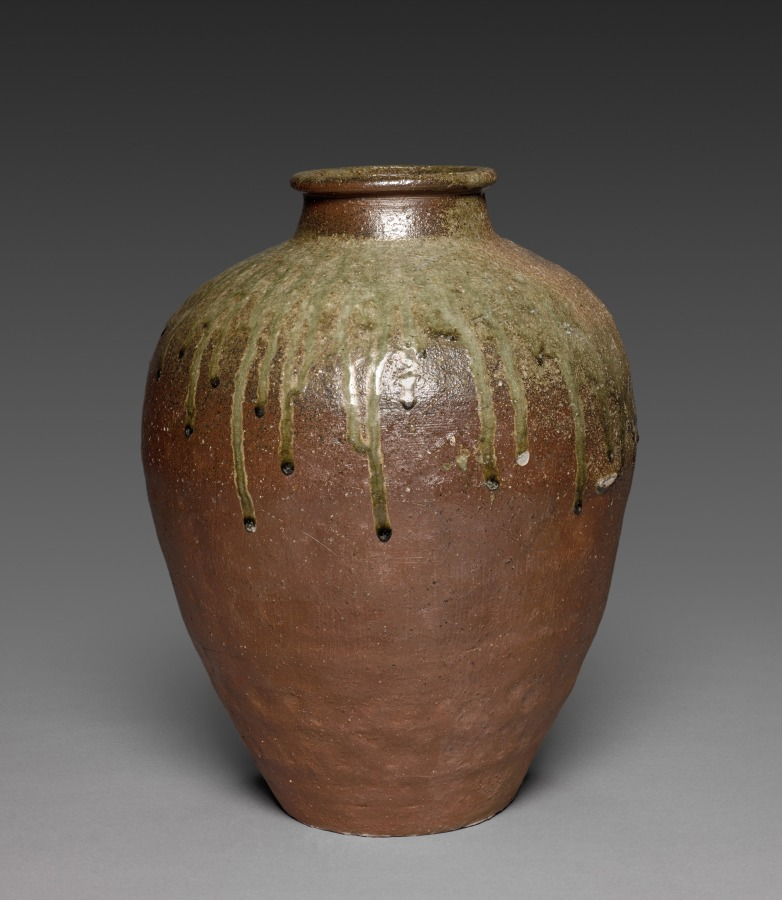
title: Water Jar: Ko Tamba ware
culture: Japan, Muromachi period (1392–1573)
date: mid-1500s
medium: stoneware with natural green ash glaze (Tamba ware)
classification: Ceramic